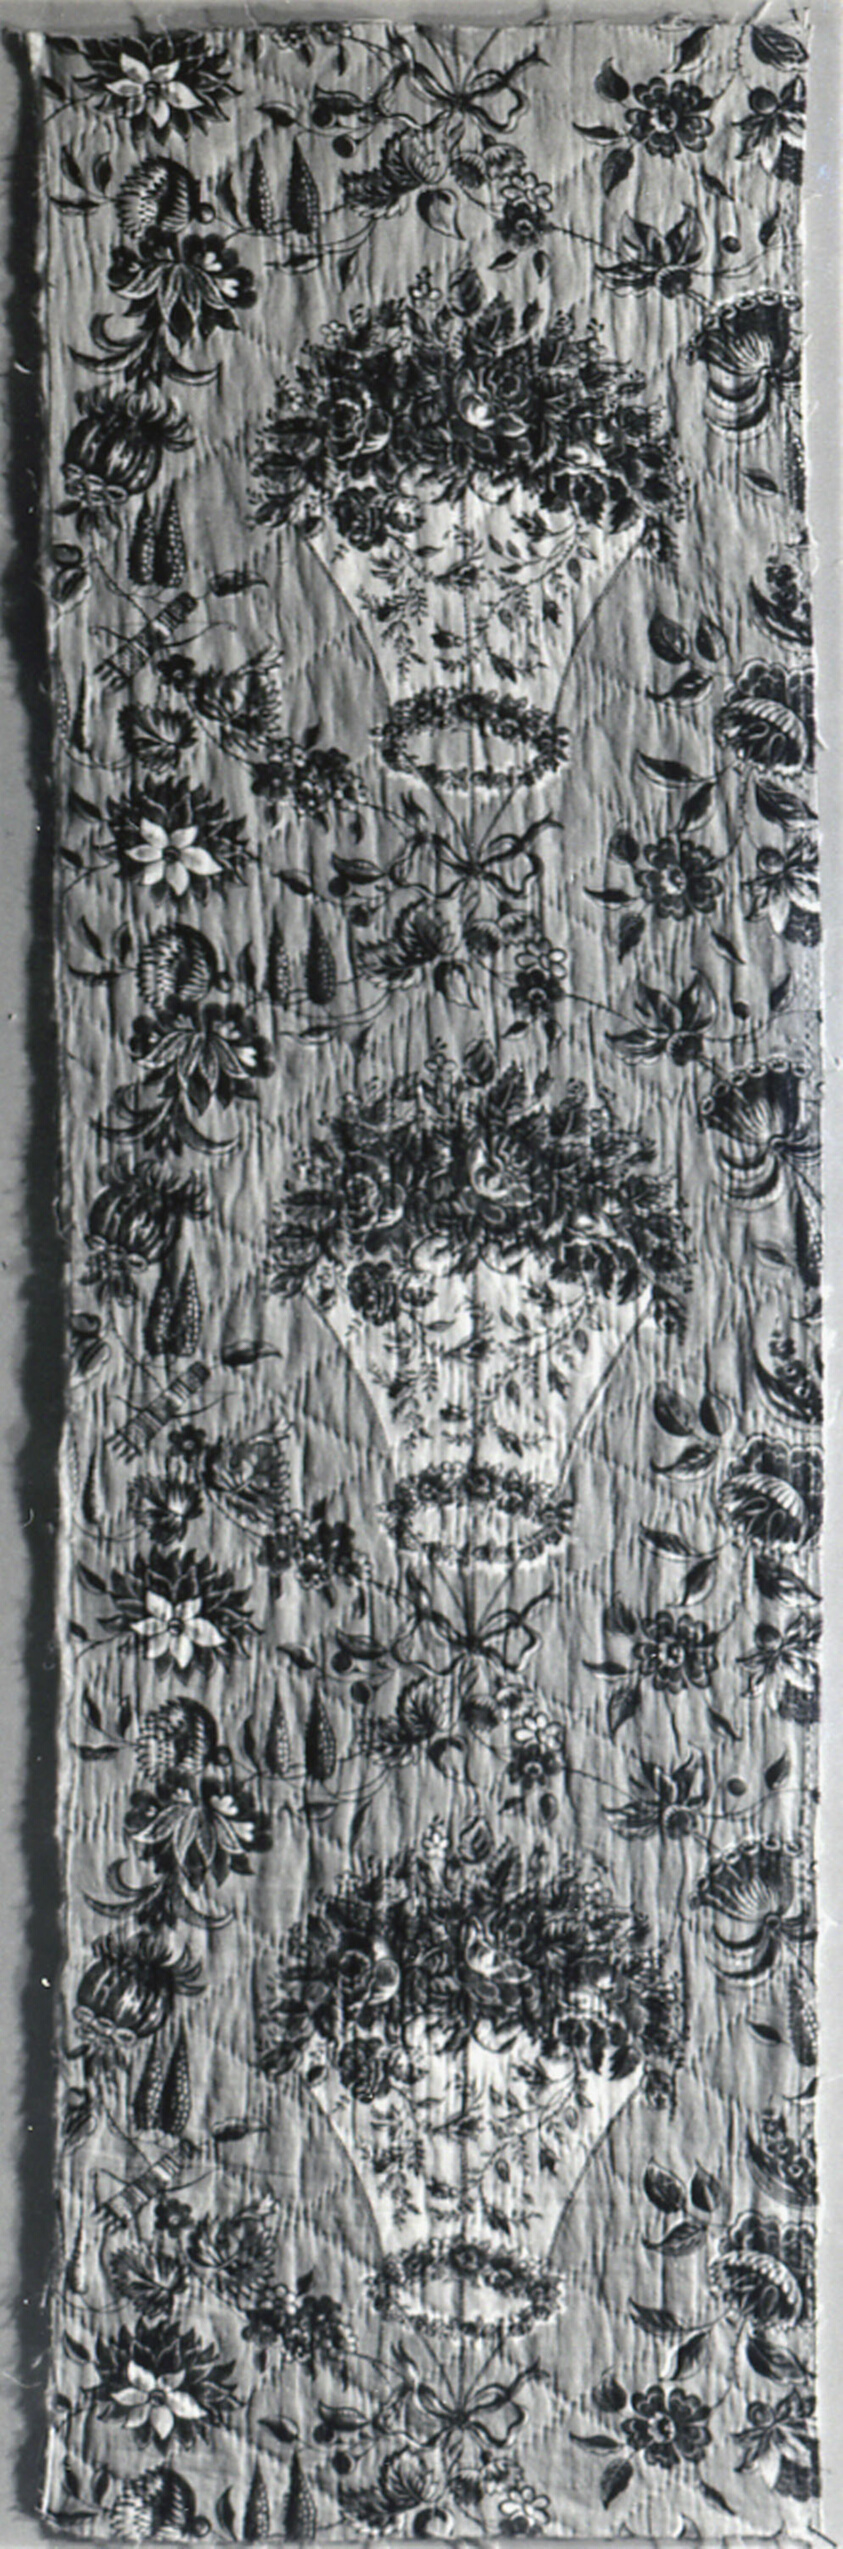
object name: Textile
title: Panel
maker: England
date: c. 1830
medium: roller printed and block over print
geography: England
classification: textile; weaving - printed